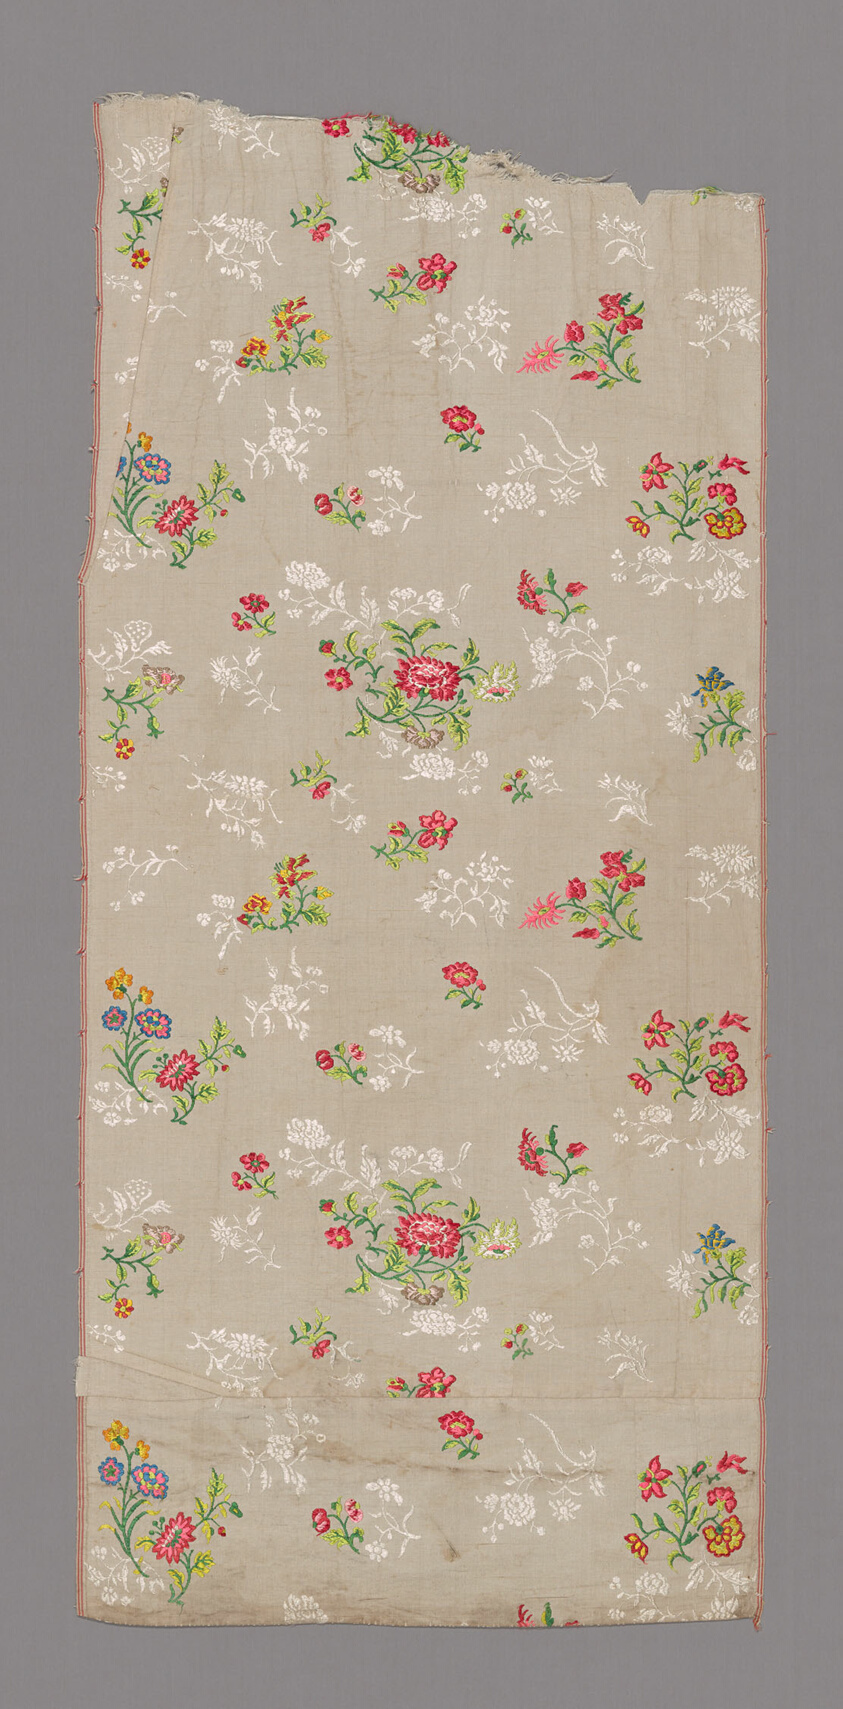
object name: Textile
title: Panel (Dress Fabric)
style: qing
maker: China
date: Qing dynasty (1644–1911), 1725/50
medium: Silk, plain weave with supplementary patterning and brocading wefts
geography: China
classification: textile; weaving